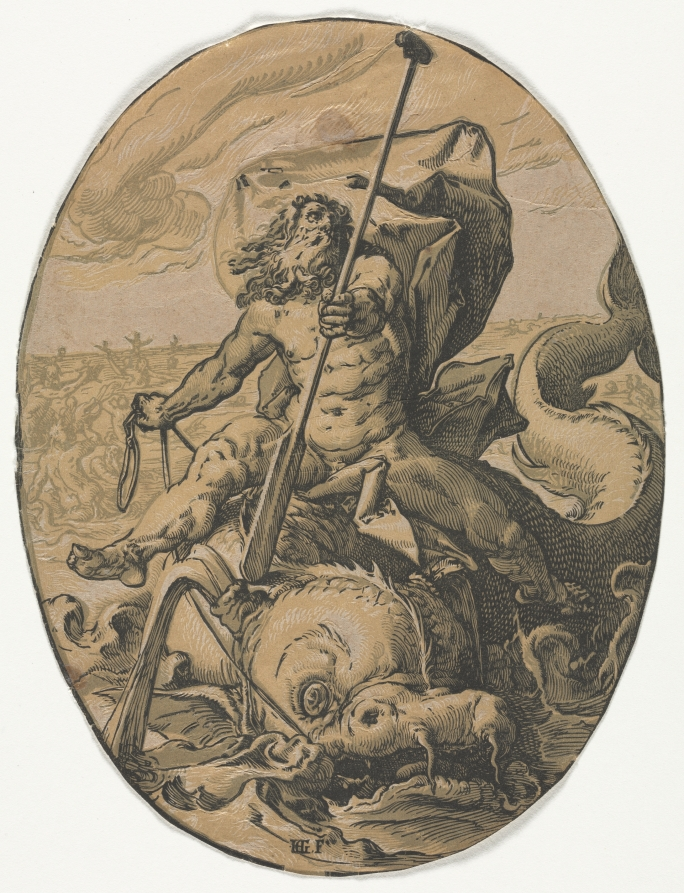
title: The Deities: Oceanus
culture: Netherlands, late 16th-early 17th century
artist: Hendrick Goltzius (Dutch, 1558–1617)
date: 1588–90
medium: chiaroscuro woodcut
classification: Print